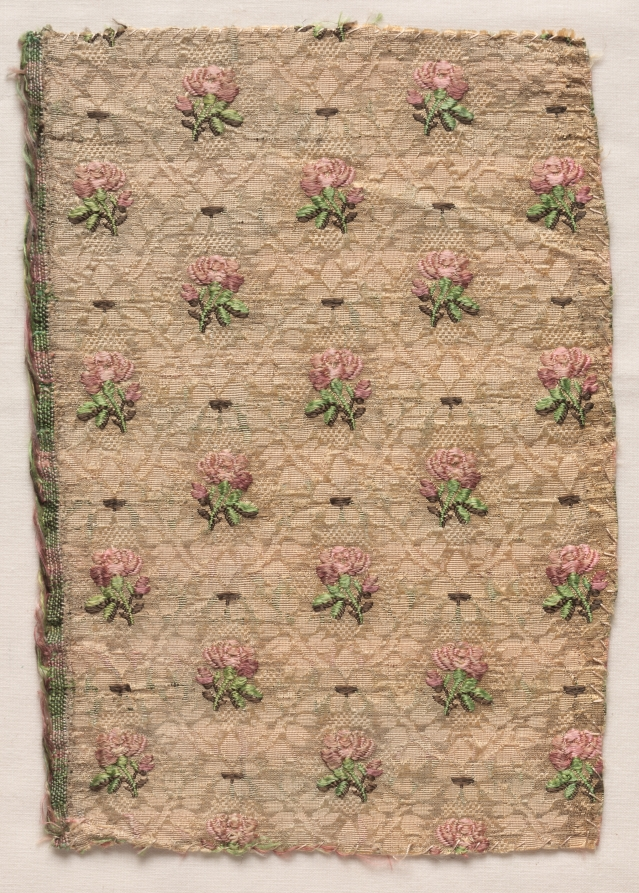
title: Textile Fragment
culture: France, late 18th century, Period of Louis XVI (1774-1793)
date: 1774–1793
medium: Droguets Lisèrés; silk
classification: Textile